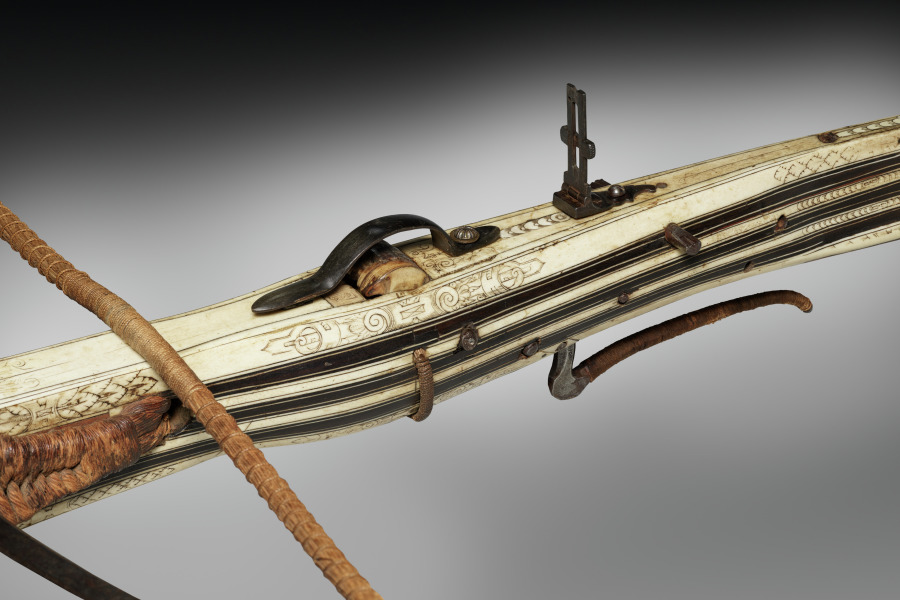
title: Crossbow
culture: Germany, early 17th Century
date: early 1600s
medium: wood, stag horn, flax cord and steel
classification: Arms and Armor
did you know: The decoration of four strips of inlaid horn was quite rare.